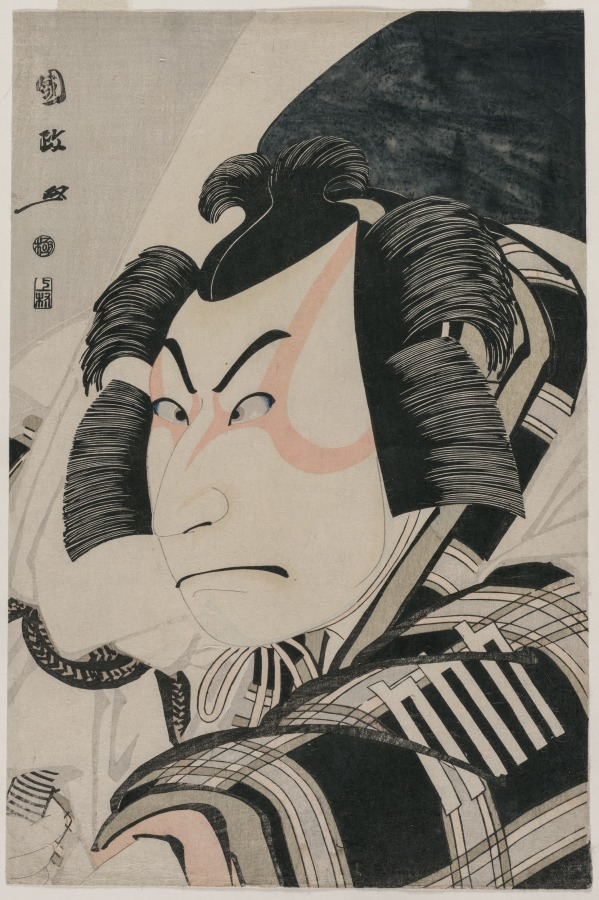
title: Nakamura Nakazo II as Matsuomaru in the Carriage-Stopping Scene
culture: Japan, Edo period (1615–1868)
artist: Utagawa Kunimasa (Japanese, 1773–1810)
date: 1796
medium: color woodblock print, with mica and lacquer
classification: Print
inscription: Signature: Kunimasa ga. Publisher: Uemura. Censorship Seal: kiwame.